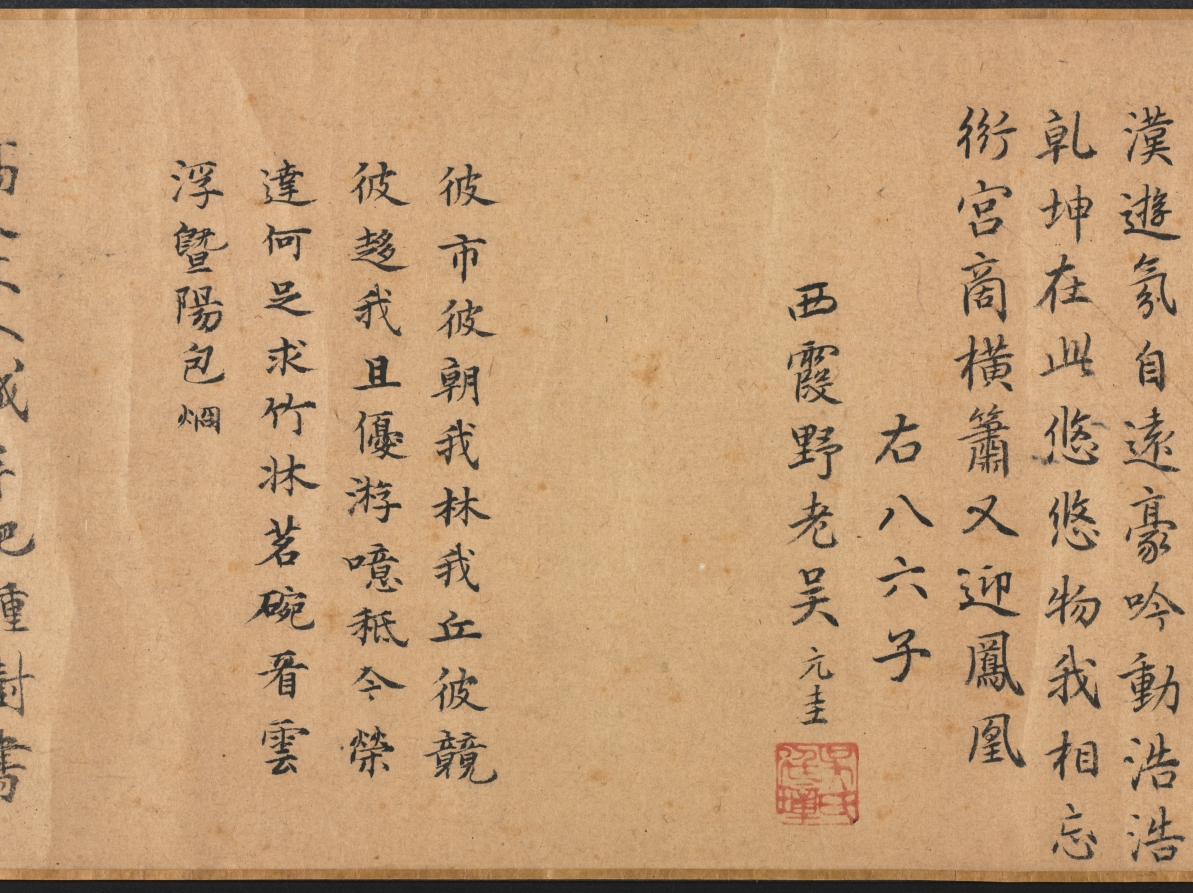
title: Leisure Enough to Spare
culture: China, Yuan dynasty (1271-1368)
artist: Yao Tingmei (Chinese, active mid-1300s)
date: 1360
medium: handscroll, ink on paper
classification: Painting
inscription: 至正廿年春正月_日作此併系鄙語于尾 地偏人遠閉柴關，滿院松陰白晝閒。 眼底風塵渾忘却，坐看流水臥看山。 吳興姚廷美畫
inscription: 23 colophons and 53 seals (dates unavailable for some): 1 colophon, dated 1360, and 2 seals of Yang Weizhen (1296-1370); 1 colophon and 3 seals of Wan Yi; 1 colophon of Zhang Junde; 1 colophon and 3 seals of Angji (act. ca. mid-14th c.); 1 colophon and 1 seal of Xu Shiquan; 1 colophon and 3 seals of Gao Yu; 1 colophon and 2 seals of Li Mingfu; 1 colophon and 2 seals of Lu Lin; 1 colophon and 1 seal of Zhang Qian; 1 colophon of Tao Tangwen; 1 colophon and 1 seal of Wu Yuangui (act. ca. 1300-60); 1 colophon of Bao Jiong; 1 colophon of Wang Zao; 1 colophon and 1 seal of Ma Chuyi; 1 colophon and 1 seal of Lin Yizhuang; 1 colophon and 1 seal of Gu Shunju; 1 colophon and 2 seals of Wang Jing; 1 colophon and 2 seals of Lin Shouchang; 1 colophon and 1 seal of Gao Zhidao; 1 colophon of Lin Xun; 1 colophon, dated 1359, and 2 seals of Meng Weicheng (act. mid-14th c.); 1 colophon and 1 seal of Meng Zhiji (act. mid-l4th c.); 14 seals of Liang Qingbiao 梁清標 (1620-1691); 1 poem dated 1755 and 5 seals of the Qianlong 乾隆 emperor (r. 1736-95); 2 seals of the Jiaqing 嘉慶 emperor (r. 1796-1821); 3 seals of the Xuantong 宣統 emperor (r. 1909-11).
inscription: Title on frontispiece by Zhang Bi 章弼: Signed Gongchen 拱辰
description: Seclusion and leisure—the ideals of the literati, or scholar-gentlemen—are expressed in this mature work by Yao Tingmei. The theme acquired special meaning at a time of the military uprisings near the end of the Yuan dynasty. Dedicated to an ascetic named Du, this work combines painting, calligraphy, and poetry; following the painting are more than 20 poems and essays written by notable scholars, one of whom was the calligrapher Yang Weizhen. It reveals not only the aesthetic taste of the literati but also the practice of contributing artistic and literary works to fulfill social obligations. Yao's painting demonstrates his individual style derived from various ancient masters (Guo Xi, Dong Yuan, and Juran). Yang Weizhen's calligraphy exhibits his bold, vigorous style and his intent to capture the spirit of antiquity in art.